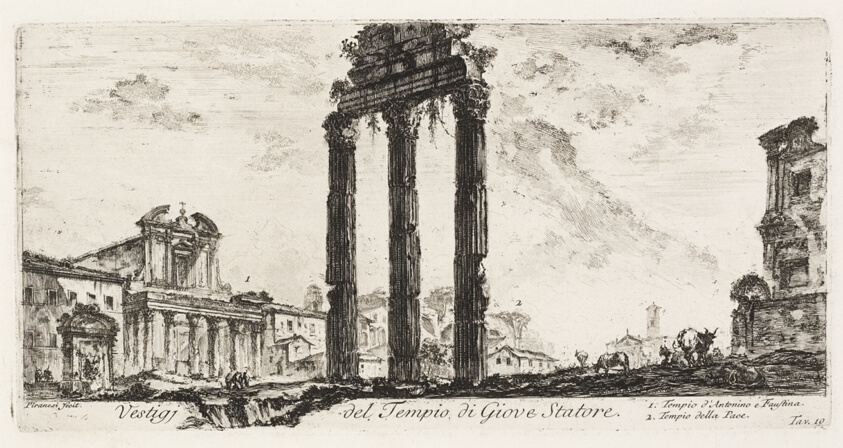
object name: Print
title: Ruins of the Temple of Jupiter Stator [Jupiter the Supporter]. 1. Temple of Antoninus and Faustina. 2. Temple of Peace, plate 10 from Some Views of Triumphal Arches and other Monuments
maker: Giovanni Battista Piranesi (Italian, 1720-1778)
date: 1748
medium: Etching on ivory laid paper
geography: Italy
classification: etching; print; prints and drawing